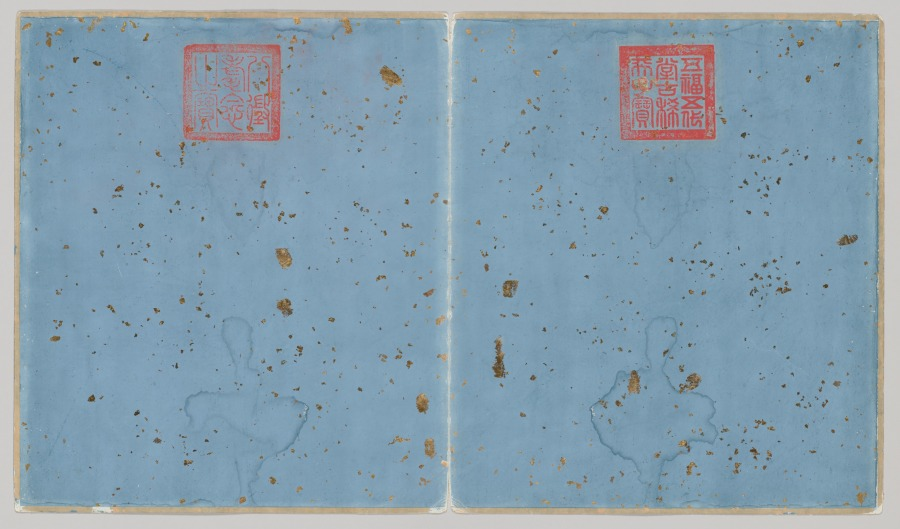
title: Battle Scenes of the Quelling of Rebellions in the Western Regions, with Imperial Poems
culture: China, Qing dynasty (1644–1911), Qianlong reign (1736–95)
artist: Giuseppe Castiglione (Italian, 1688–1766)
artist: Jean Damascene Sallusti (Italian, d. 1781)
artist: Jean Denis Attiret (French, 1702–1768)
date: c. 1765–74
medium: Etchings, mounted in album form, 16 leaves plus two additional leaves of inscriptions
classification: Print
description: This set of etchings was commissioned by Emperor Qianlong to record in pictorial terms the courage of his generals and soldiers in quelling the rebellions in the Western Regions. Qianlong added his own poem to each of the etchings, indicating his appreciation and pride in this demonstration of military might. "Western Regions" refers to the present-day Xingjiang province, often described in Western writing as "Central Asia."